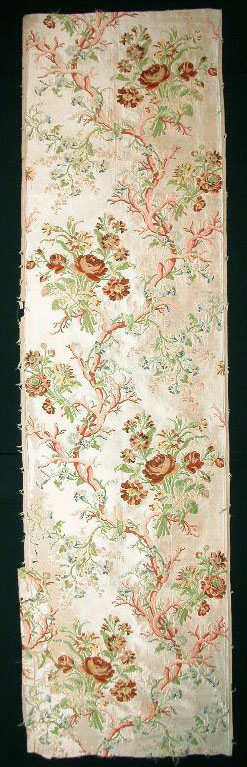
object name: Textile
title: Branche de Corail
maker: Designed by Philippe de LaSalle (French, 1723–1803/05); France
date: c. 1780/85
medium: Silk and silk chenille yarns, plain weave with twill interlacings of secondary binding warp and facing wefts and with plain interlacings of secondary binding warps and brocading wefts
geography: France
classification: textile; weaving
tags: flowers